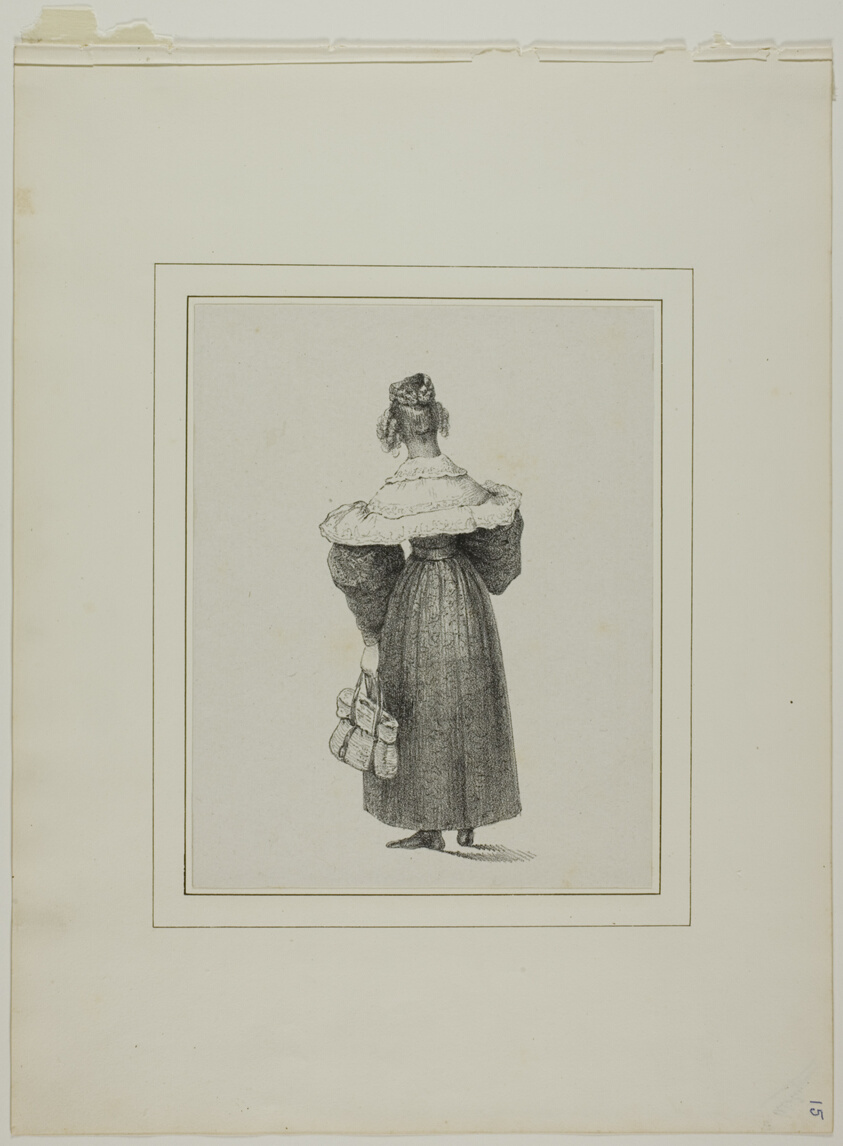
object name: Print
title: Woman Seen from the Back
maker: Unknown artist; French, 19th century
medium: Lithograph in black on ivory wove paper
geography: France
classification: lithograph; print; prints and drawing